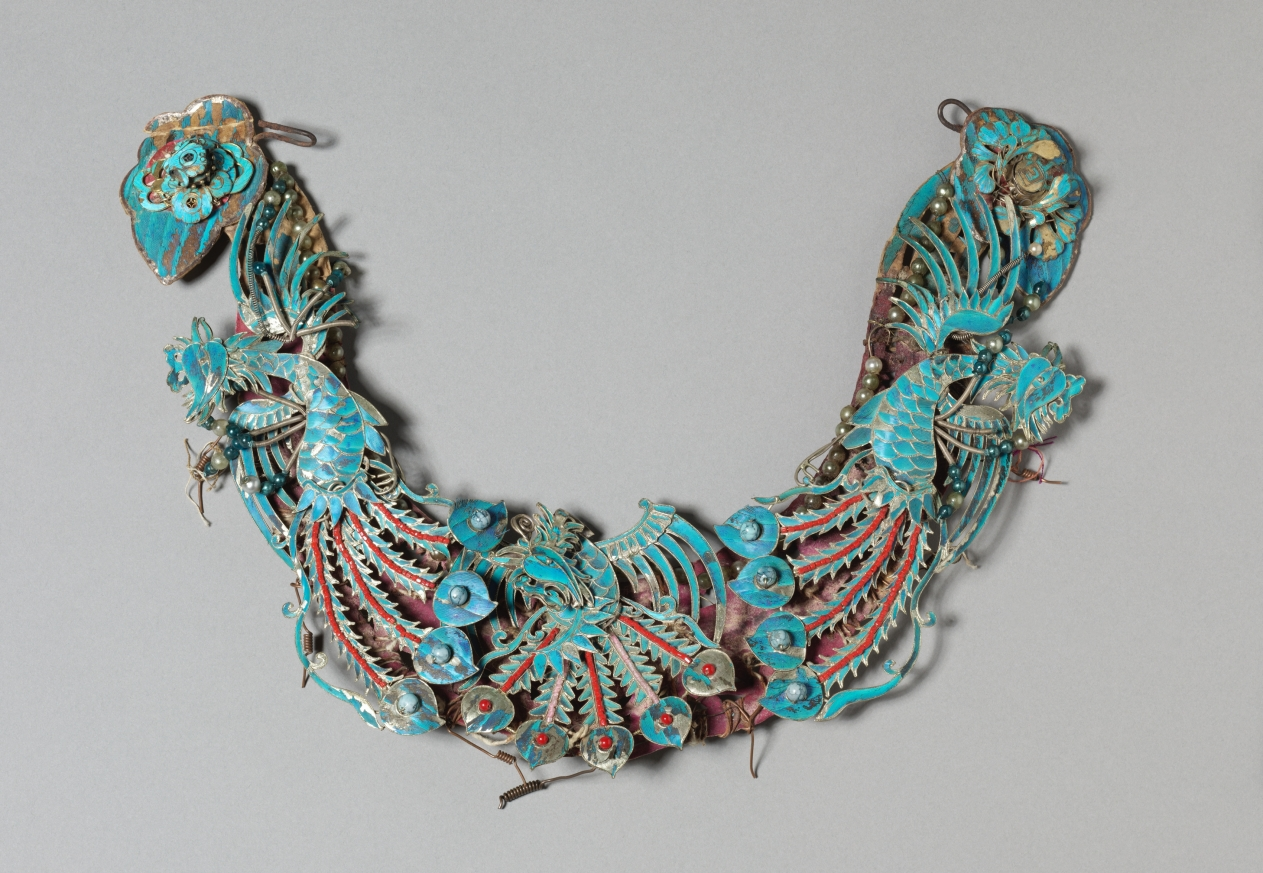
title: Headdress Ornament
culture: China, Qing dynasty (1644-1911)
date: 1700s or 1800s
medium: Copper-silver alloy, gilding, kingfisher feathers, glass beads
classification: Jewelry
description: Hair ornaments depicting flowers, butterflies, or birds were worn by ladies of the Manchu elite class.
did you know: The iridescent blue feathers of kingfisher birds are inlaid in hairpins and headdresses.